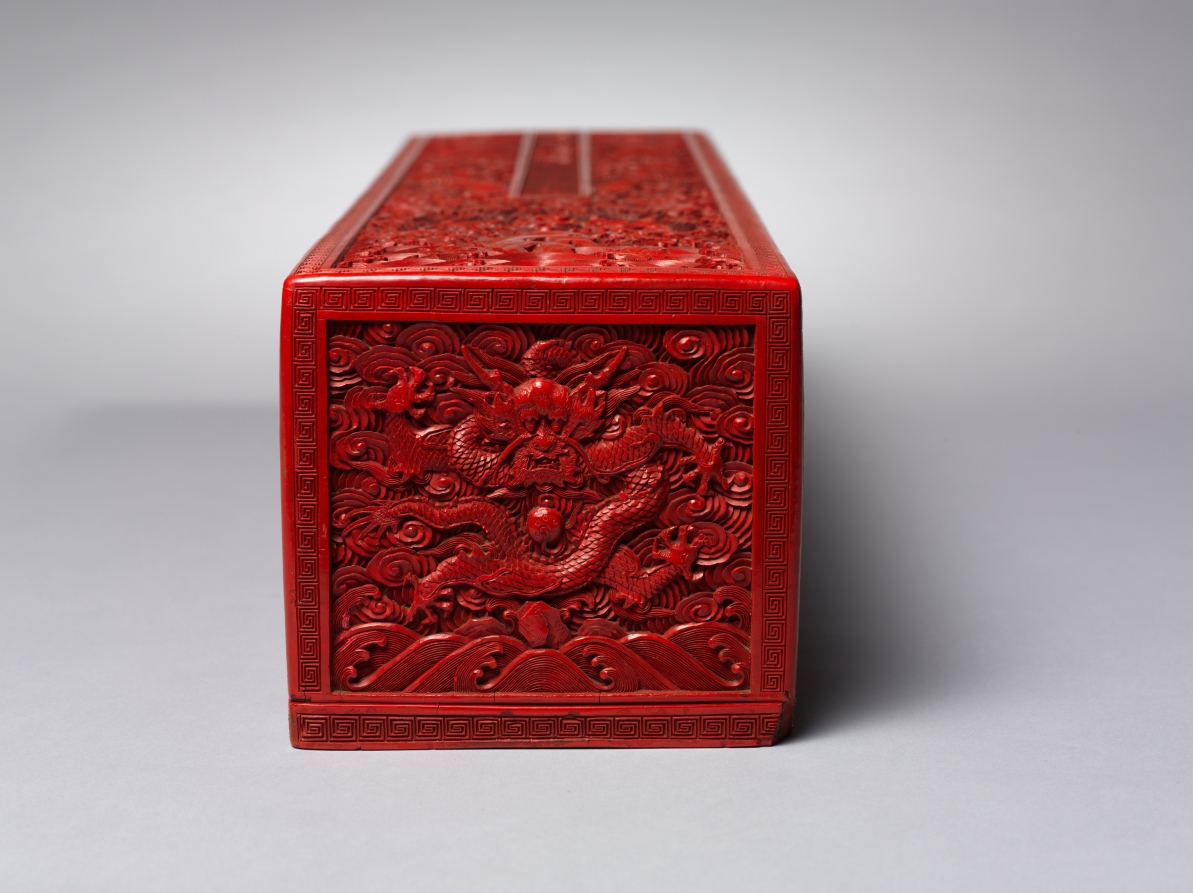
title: Carved Lacquer Scroll Box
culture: China, Qing dynasty (1644–1911), Qianlong reign (1736–95)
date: 1736–95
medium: Red carved lacquer on wood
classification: Lacquer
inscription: 心寫治平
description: The elaborate design, superior craftsmanship, and inscription carved into the red cinnabar lacquer proclaim the imperial pedigree of this scroll box. On either end is a five-clawed dragon, a design reserved only for an emperor. More dragons twist and wind through swirling clouds and waves along the length of the box’s sides and top. The carving is intricate and vigorous, while the design is controlled and regular. This box housed the private portraits of the Qianlong Emperor, his empress, and 11 other favorites among his presumed 40 or more wives during his 60-year reign. It was commissioned to be made in Suzhou when no more portraits were added to the scroll. An entry in the imperial workshop records relates to the Cleveland box. It states that in 1787, a box design with a dragon pattern, including the inscription, In his heart is envisioned a peaceful reign, was sent to a Suzhou workshop. Imperial portraits were collected in the Chonghua Palace in the Forbidden City, and the emperor’s portrait was kept in this red lacquer box from Suzhou.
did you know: This is the original box for the handscroll Portraits of the Qianlong Emperor and His Twelve Consorts, CMA 1969.31.